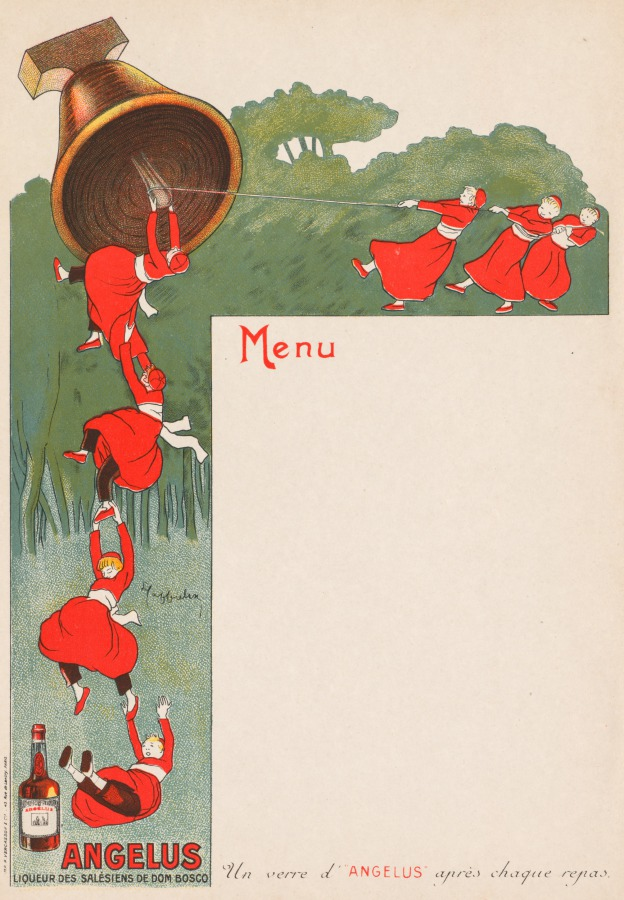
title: Menu Page (Angelus: Liqeur des Salésiens de Dom Bosco)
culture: Italy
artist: Leonetto Cappiello (Italian, 1875–1942)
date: 1911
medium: Color lithograph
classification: Print